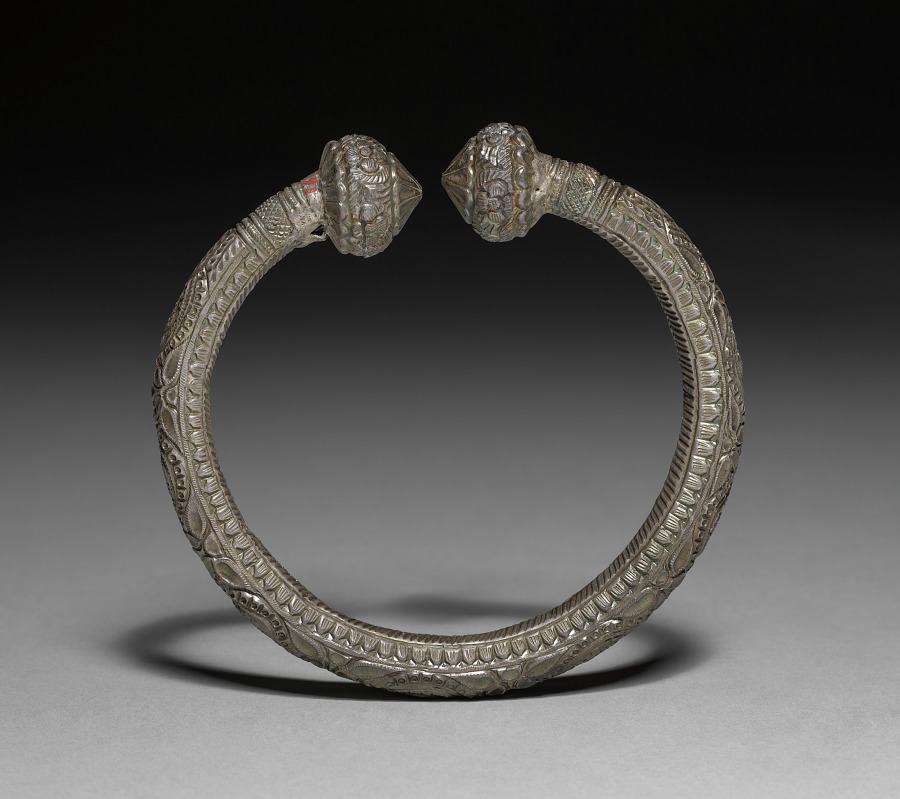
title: Anklet, or Kara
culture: India - Rajputana or Malwa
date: 1800s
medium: silver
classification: Jewelry